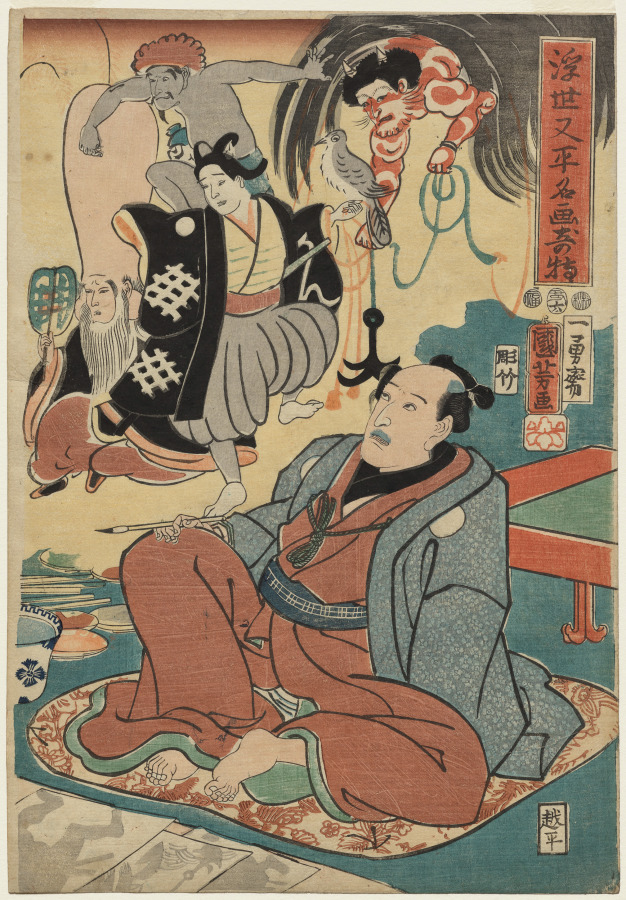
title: The Strange Occurrence of Ukiyo Matahei and his Famous Paintings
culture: Japan, Edo period (1615–1868)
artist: Utagawa Kuniyoshi (Japanese, 1797–1861)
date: 1853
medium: diptych, color woodblock prints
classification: Print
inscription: Signature: Ichiyusai Kuniyoshi ga Artist Seal: paulownia Publisher: Echimura Heisuke (Echihei) Engraver: Hori Take Censorship Seal: Muramatsu, Fuku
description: In this image, otsu-e folk heroes have seemingly come to life, leaving their shadowy figures in the paintings in front of the artist. Included among them are a demon (oni), a monkey, the wisteria maiden, and the bald, tall-headed God of Longevity, Fukurokuju. Ukiyo Matahei, also known as Iwasa Matabei, was a famous printmaker who is also thought to have been a painter of otsu-e.